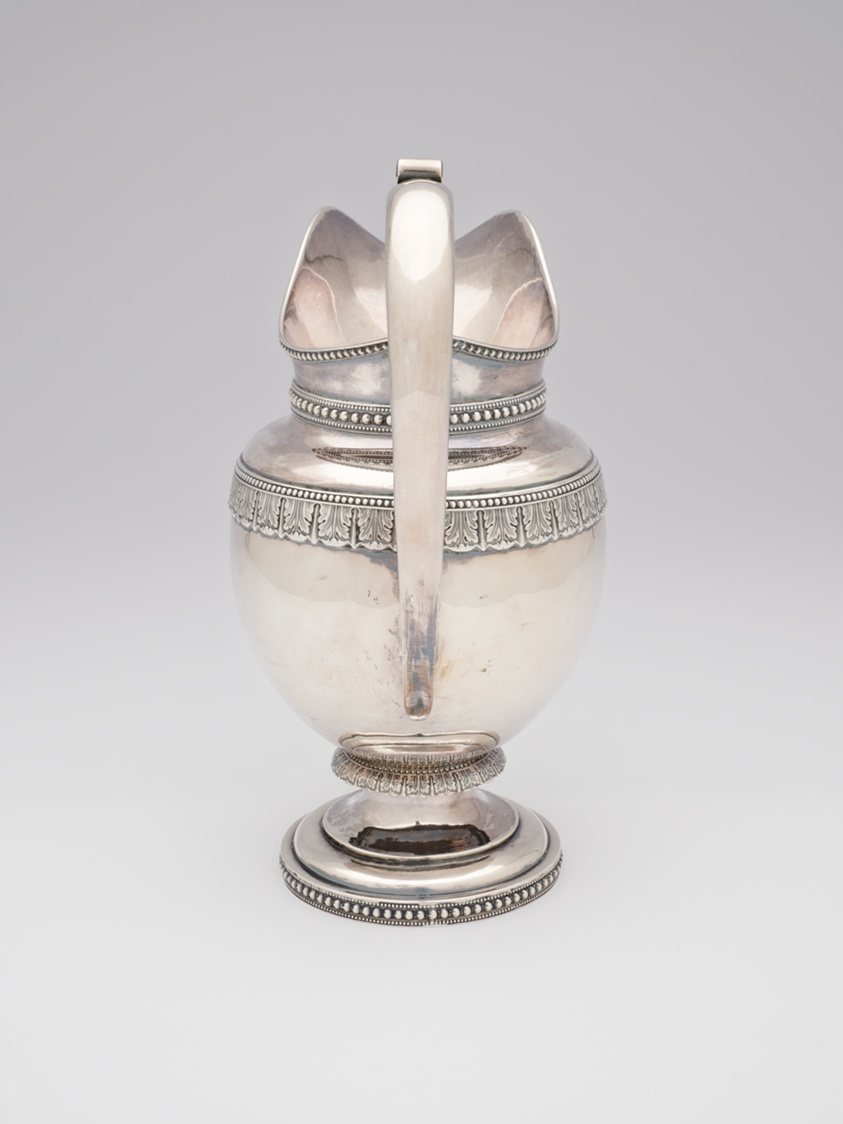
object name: Metalwork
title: Pitcher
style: 19th century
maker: Retailed by Baldwin Gardiner (American, 1791–1869); New York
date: 1827–48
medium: Silver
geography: New York City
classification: pitcher (vessel); silver; decorative arts